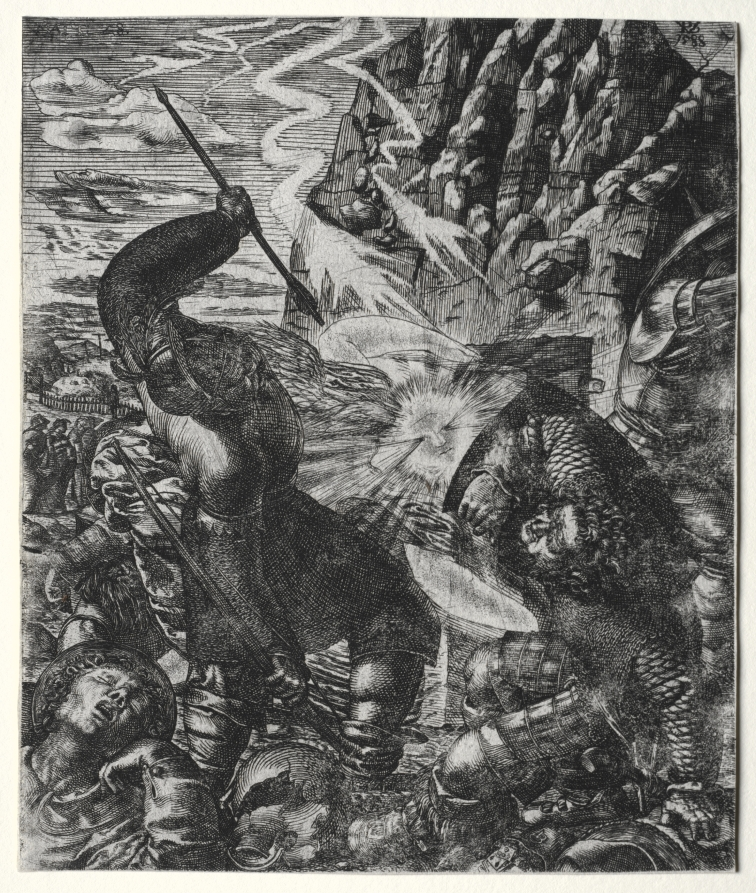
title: The Resurrection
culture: Germany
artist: Philipp Uffenbach (German, 1566–1636)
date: 1588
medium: etching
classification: Print